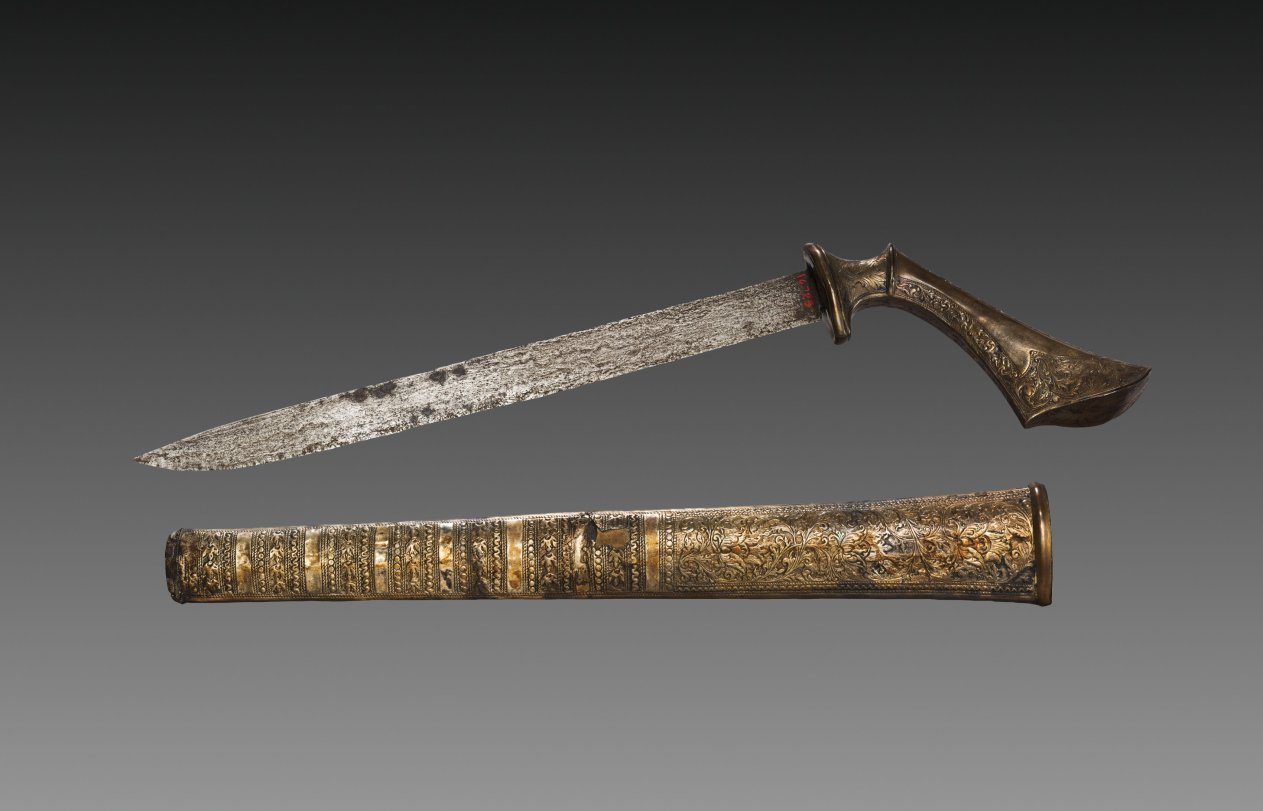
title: Knife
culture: Sumatra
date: 1500s–1800s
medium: Blade: steel; handle: copper alloy with silver gilt; scabbard: copper alloy, silver gilt, wood, and textile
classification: Arms and Armor